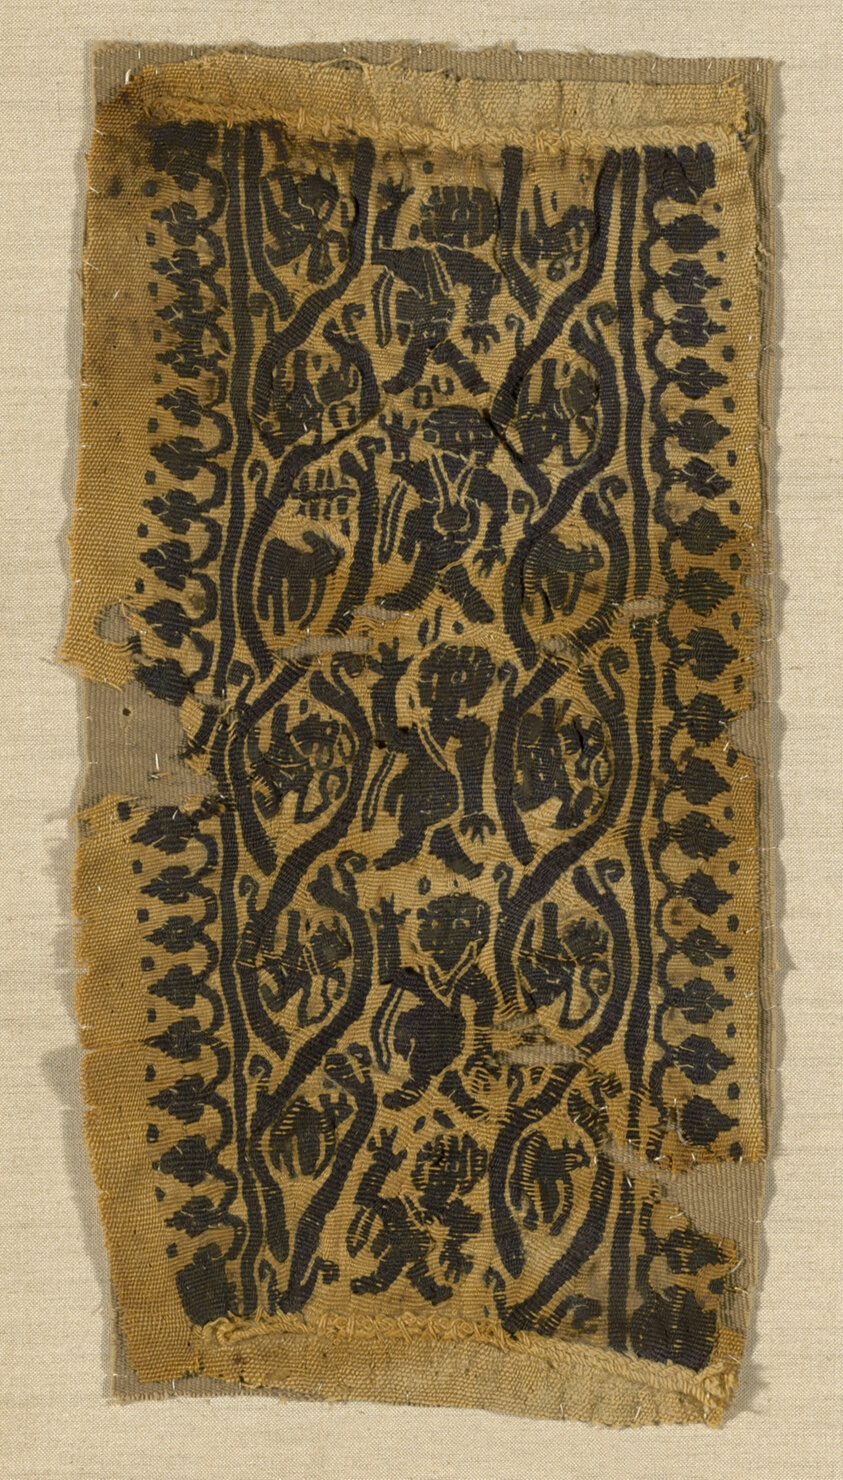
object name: Textile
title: Band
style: roman period (egyptian)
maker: Coptic (Egypt)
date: Roman period (30 B.C.– 641 A.D.), 3rd/6th century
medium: Wool, tapestry weave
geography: Egypt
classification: textile; weaving